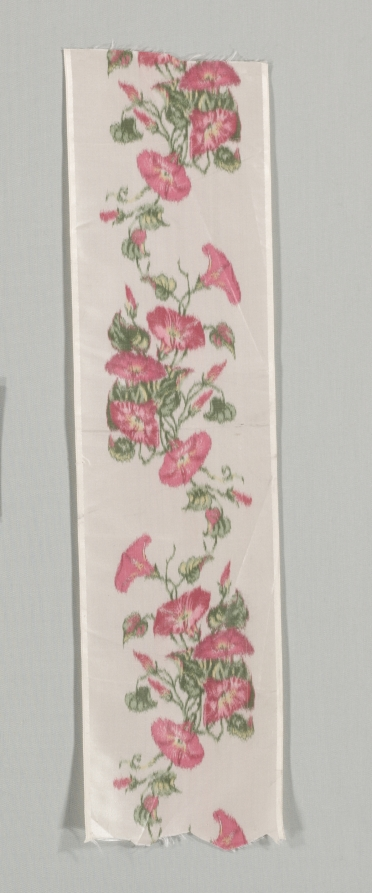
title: Ribbon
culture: France, 19th century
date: 19th century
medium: silk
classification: Textile